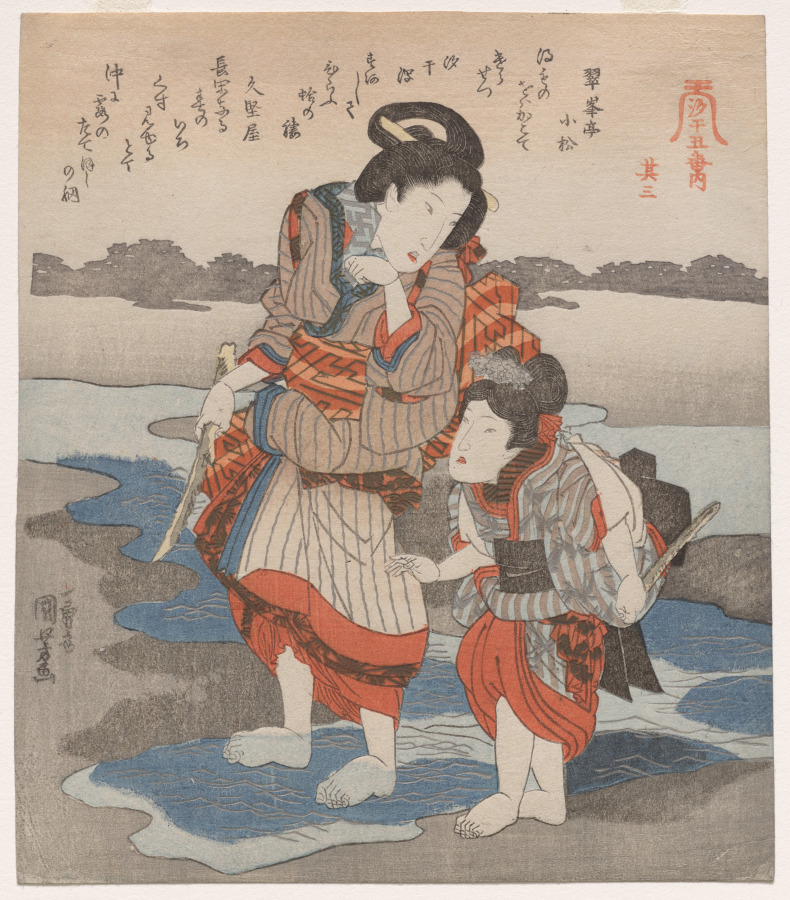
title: Third Print from A Low Tide Pentaptych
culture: Japan, Edo period (1615–1868)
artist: Utagawa Kuniyoshi (Japanese, 1797–1861)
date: c. 1830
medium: color woodblock print from a pentaptych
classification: Print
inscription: Signature: Ichiyusai Kuniyoshi ga.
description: This is one of five surimono, privately commissioned prints, making up an image of people collecting sea life at low tide. Ten witty poems, written by members of a poetry circle, appear across the upper part of the composition, with two poems on each print. Based in Edo (now Tokyo), the group was led by Hisakataya Misora (active 1810s–30s), who wrote four of the poems. This composition may have been printed in April, which was considered the best time for beachcombing.